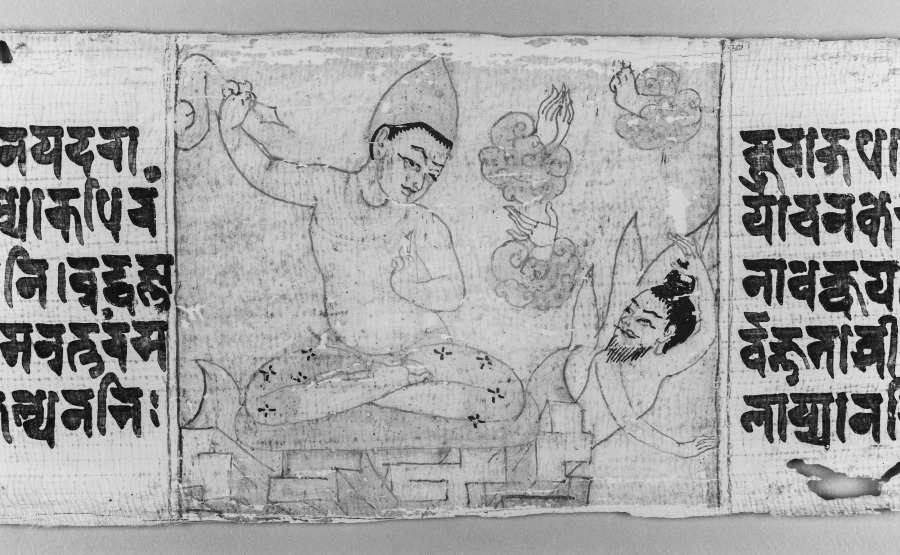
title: Bodhisattva Samantabhadra purifies the path to enlightenment, with Manjushri, folio 348 (verso) from a Gandavyuha-sutra (Scripture of the Supreme Array)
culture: Nepal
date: 1000–1100s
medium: gum tempera and ink on palm leaf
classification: Painting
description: The painting in the center shows a righteous bodhisattva tossing aside a blue-skinned heretic, while an impious blue-clad monk sits behind them, the next to be overpowered by the righteous one. In the painting on the left, the Bodhisattva of Wisdom, Manjushri, brandishes his sword, and at the far right, a Buddhist priest (Vajracharya) sets fire to a Hindu sage in a rocky landscape.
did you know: Blue-clad monks were said to visit prostitutes, drink liquor, and practice extreme tantric rituals.